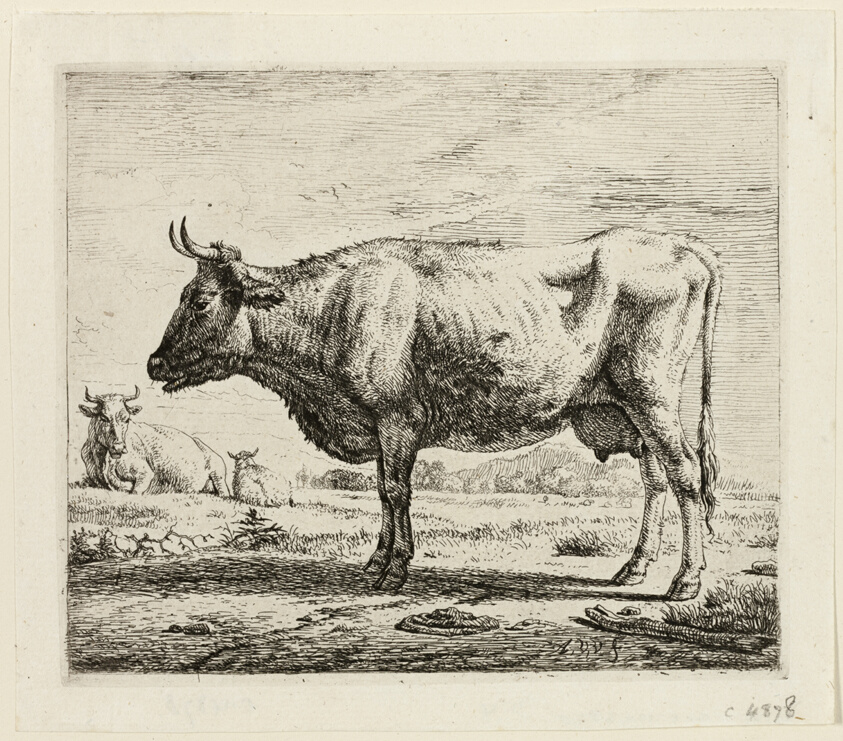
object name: Print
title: Two Cows and a Sheep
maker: Adriaen van de Velde (Dutch, 1636-1672)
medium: Etching on ivory paper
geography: Holland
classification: etching; print; prints and drawing